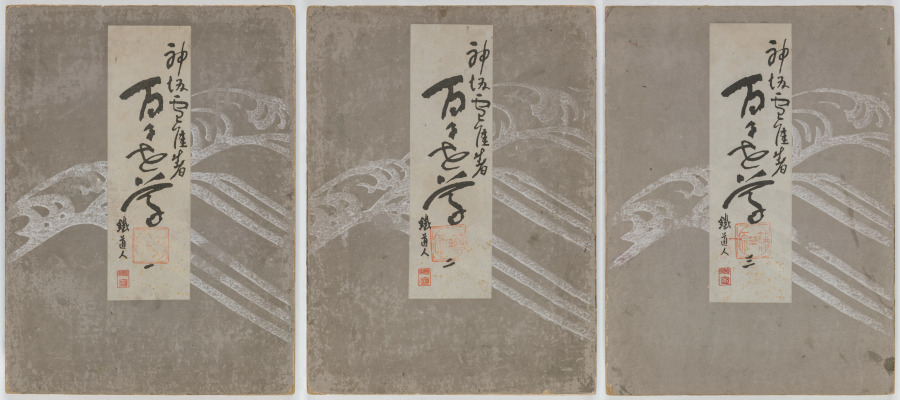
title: Flowers of a Hundred Worlds (Momoyogusa), vols. 1–3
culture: Japan, Meiji period (1868–1912)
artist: Kamisaka Sekka (Japanese, 1866–1942)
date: 1909–10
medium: set of three woodblock printed folding-books; ink, color, gold, and silver on paper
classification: Bound Volume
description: This set of three woodblock printed folding-books displays the graphic design prowess of Kamisaka Sekka. The images were first distributed one by one to subscribers to the series but later were reissued in bound form, like these books, for mass consumers. Each print features a vignette taken from nature or Japanese literature. Many of the scenes have a long history in Japan, originating in the 900s or 1000s and having been interpreted by all manner of artists since that time. Sekka’s selections hew closely to precedents from the Rinpa style originated by painter Tawaraya Sōtatsu (c. 1570–c. 1640) and calligrapher Hon’ami Kōetsu (1558–1637).